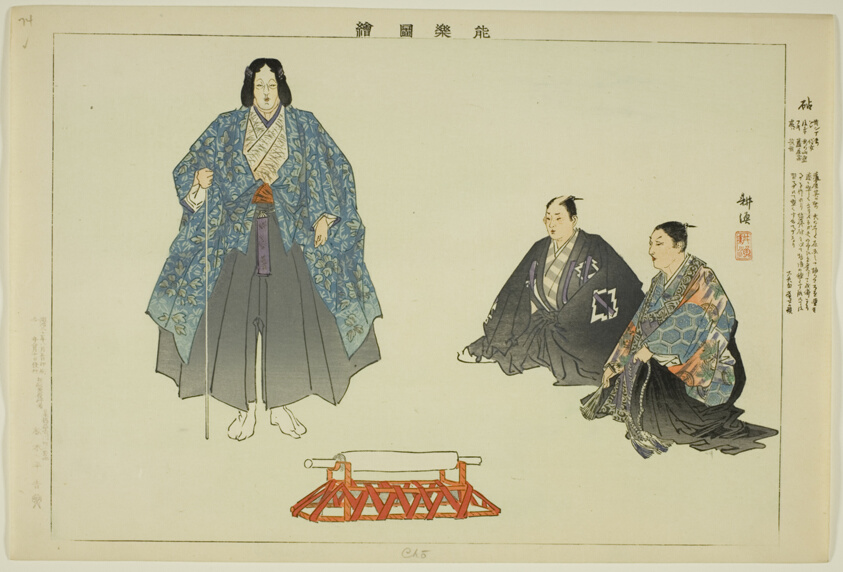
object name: Print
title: Cho (Ryo?), from the series "Pictures of No Performances (Nogaku Zue)"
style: Japanese (culture or style)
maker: Tsukioka Kogyo; Japanese, 1869-1927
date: 1898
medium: Color woodblock print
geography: Japan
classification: woodblock print; print; asian art